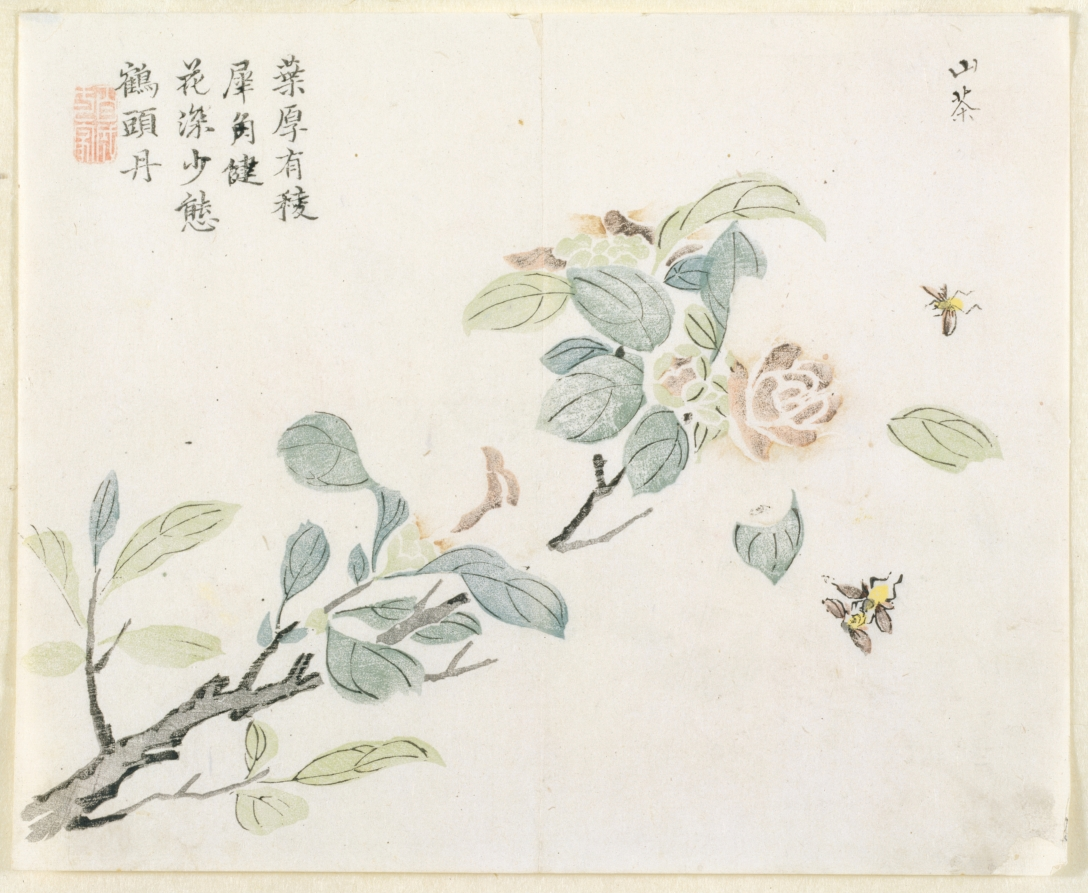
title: Flowering Branch with Bees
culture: China, Qing dynasty (1644-1911)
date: 18th Century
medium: color woodblock print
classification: Print